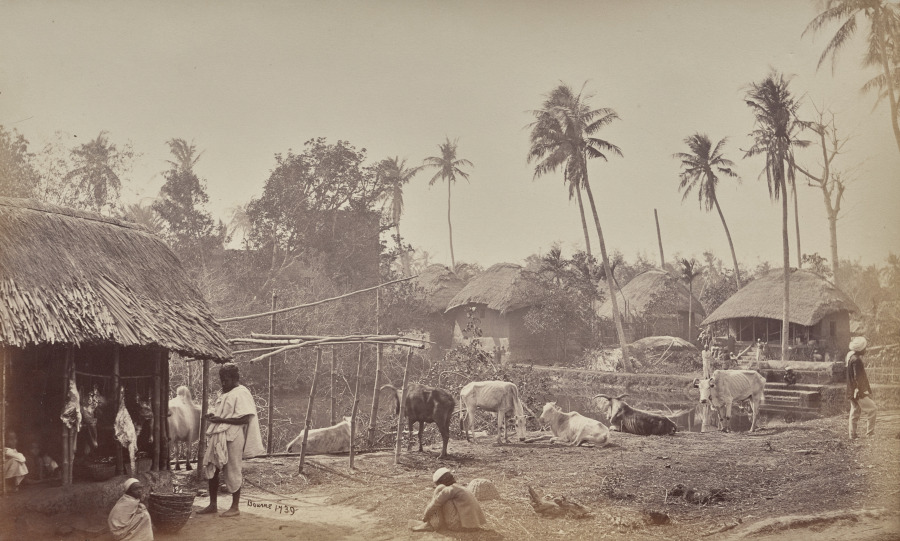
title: A Village Scene, Near Calcutta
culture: England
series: Photographs of Northern India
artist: Samuel Bourne (British, 1834–1912)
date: 1863–70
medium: albumen print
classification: Photograph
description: The 50 images in this album, all taken in the 1860s, move from the hill towns of the Himalayas down to cities including Lahore (now in Pakistan), Delhi, Lucknow, Agra, Benares (now Varansi), and Calcutta (now Kolkata). Architectural studies of major monuments offer valuable historical records of what sites such as the Taj Mahal and the imperial mosque of the Mughal emperors in Delhi looked like before twentieth-century restorations.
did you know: Samuel Bourne, the author of most the images in this album, was a banker in England before he moved to India to become a professional photographer.